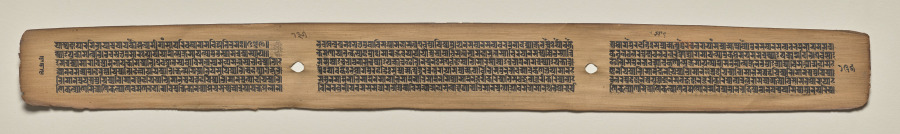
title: Text, Folio 135 (verso), from a Manuscript of the Perfection of Wisdom in Eight Thousand Lines (Ashtasahasrika Prajnaparamita-sutra)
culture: Eastern India, Bihar, Vikramashila Monastery. Painting: Nepal, Kathmandu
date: Sunday, September 14, 1119 (year 239 of the Newar Samvat in the month of Ashvina)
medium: gum tempera and ink on palm leaves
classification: Painting